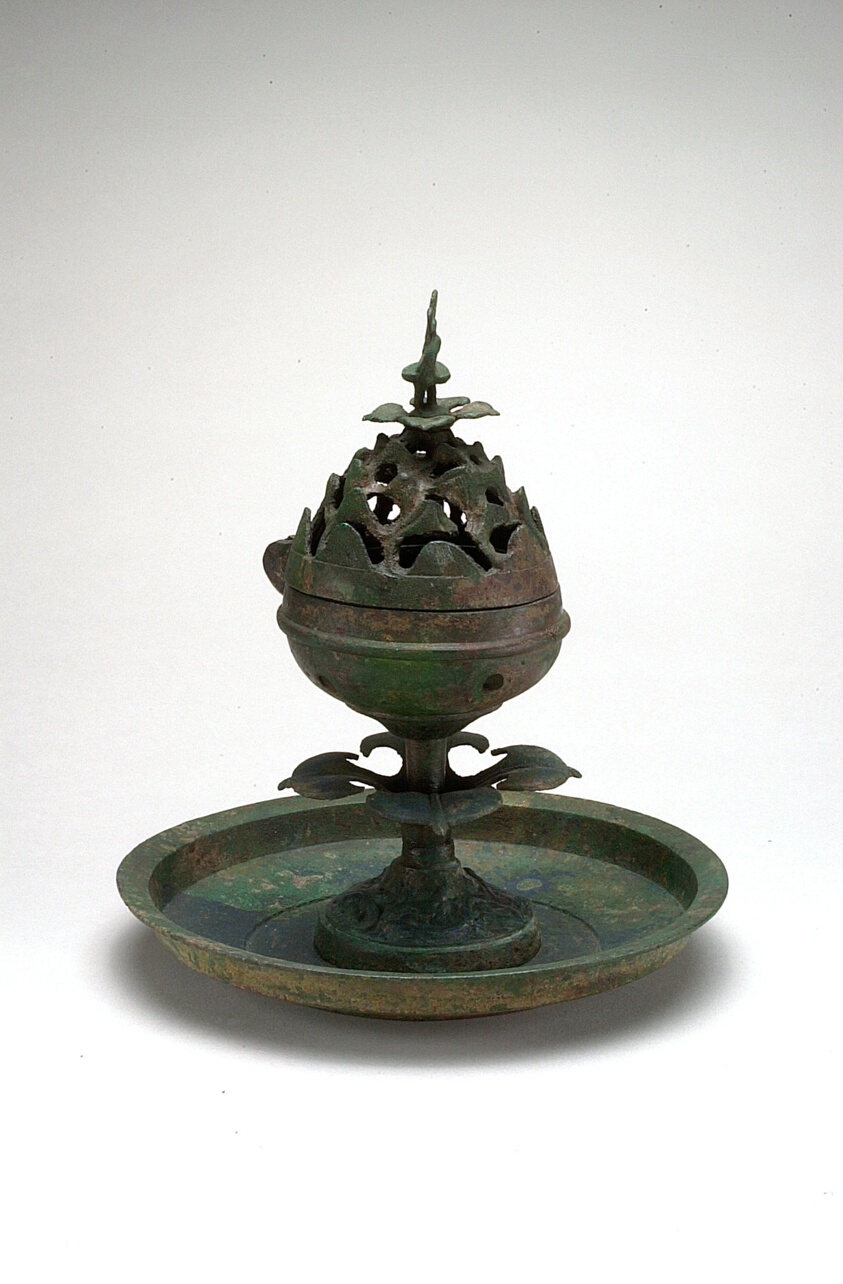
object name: Religious/Ritual Object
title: Mountain-Shaped Incense Burner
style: Chinese (culture or style)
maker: China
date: Han dynasty (206 BCE–220 CE), 100 BCE–100 CE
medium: Bronze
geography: China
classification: bronze; asian art; ritual objects